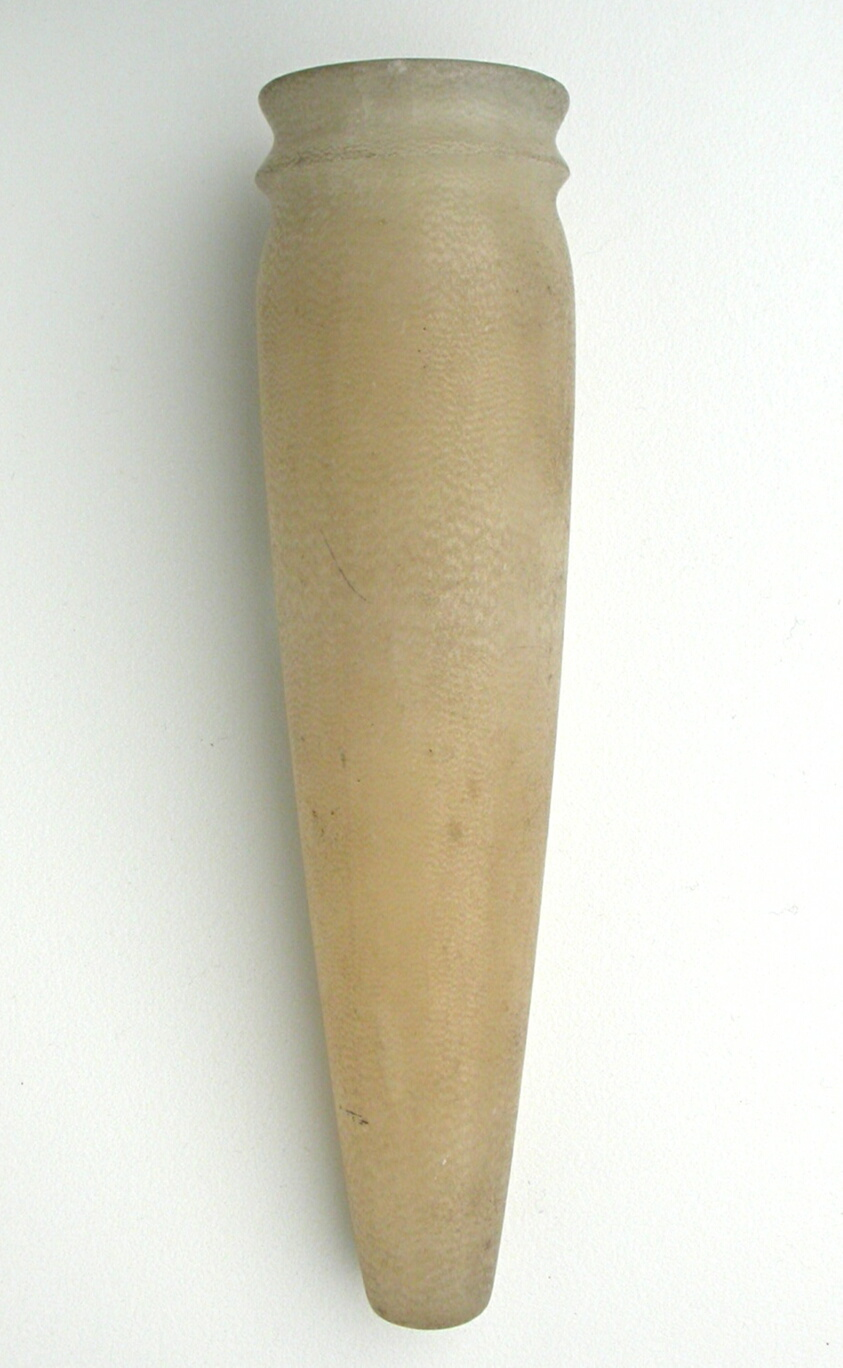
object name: Vessel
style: old kingdom, first intermediate period, egyptian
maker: Egyptian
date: Old Kingdom, Dynasty 5–6 (about 2494–2181 BCE)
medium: Travertine (Egyptian alabaster)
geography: Egypt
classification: vessel; stone; ancient art